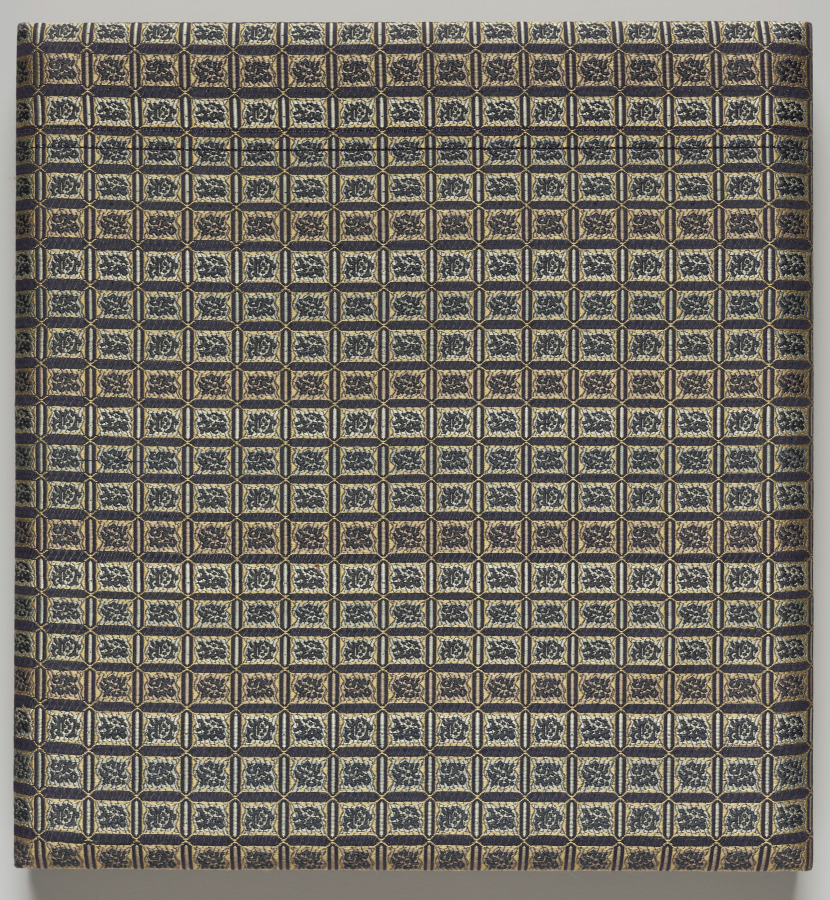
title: Album of Paintings by the Venerable Zeshin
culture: Japan, Edo period (1615–1868)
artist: Shibata Zeshin (Japanese, 1807–1891)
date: 1847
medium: accordion-style album of 12 leaves; ink, color, and gold on silk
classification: Bound Volume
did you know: Textile covers for albums help protect the works of art inside and add to their appeal--the title slip for this album has been left blank.